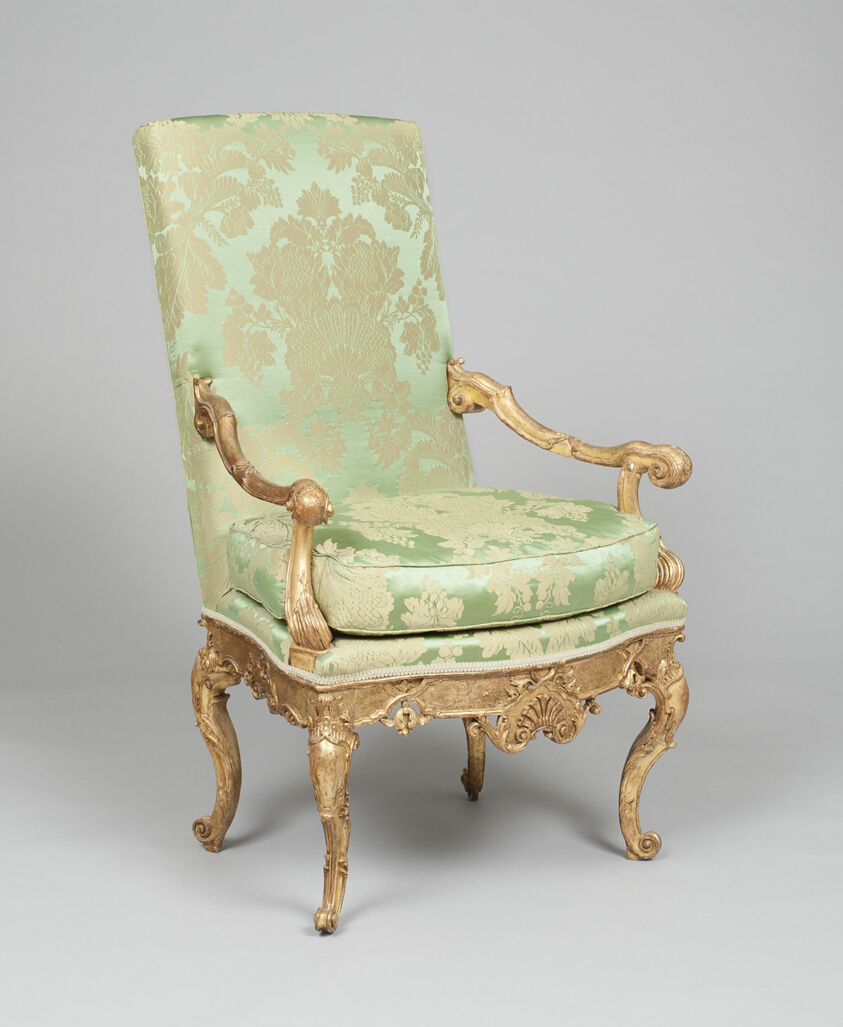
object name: Furniture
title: Armchair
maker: Venice, Italy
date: c. 1745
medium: Caned, giltwood, and modern upholstery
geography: Venice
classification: seating; furniture; european decorative arts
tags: furniture